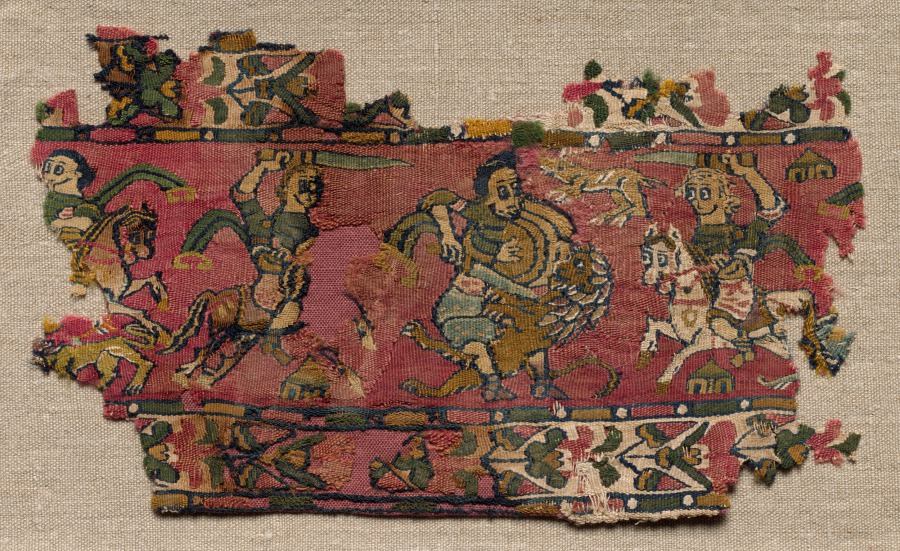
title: Fragment of a Band or Border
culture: Egypt, Umayyad period (661–750) or Abbasid period (750–1258)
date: late 600s–800s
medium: Wool and linen: tapestry weave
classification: Textile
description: This lively hunting scene features a central figure grappling with a lion. He is flanked by hunters on horseback brandishing swords. The swirling clothing of the hunters and the dynamic poses of the animals give a sense of movement to the band. The entire scene is bordered with a vibrant floral design. Hunting was a popular artistic theme in pre-Islamic traditions, including Sasanian and Assyrian art, and was then adopted into Islamic artistic vernacular.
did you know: The warp is undyed linen, and the weft is wool for the polychrome and linen for the white.